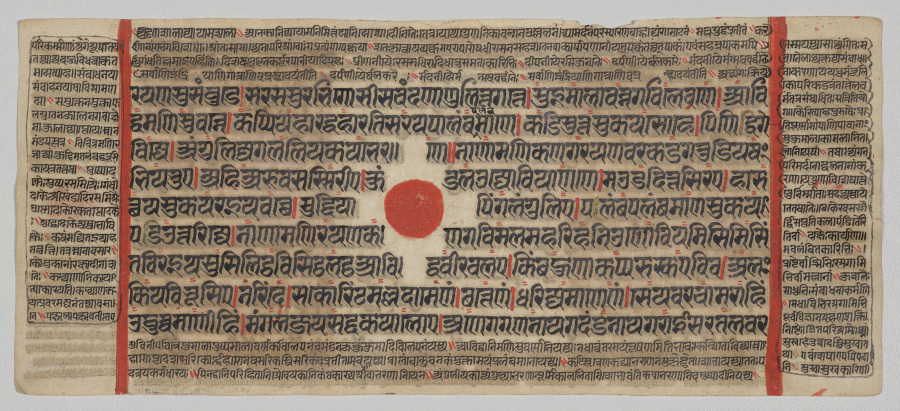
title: Text, Folio 23 (recto), from a Kalpa-sutra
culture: Western India, Gujarat, last quarter of the 15th century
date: c. 1475–1500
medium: Gum tempera, ink, and gold on paper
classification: Painting